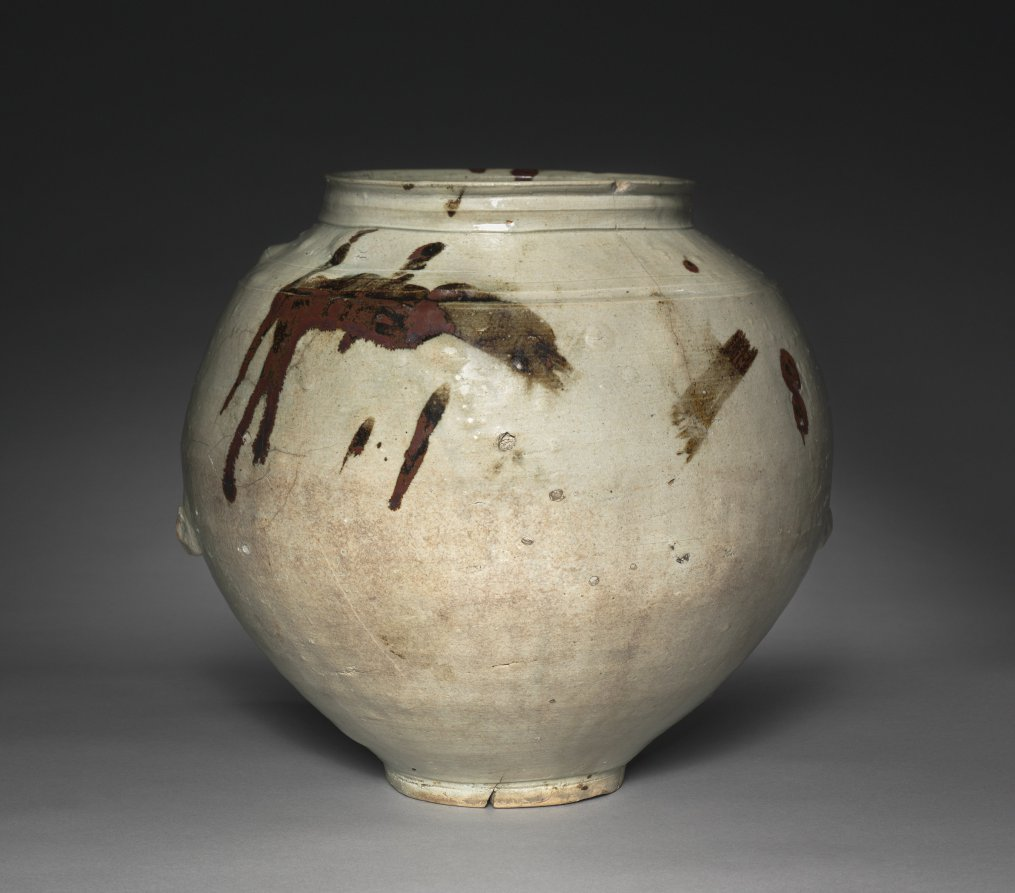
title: Jar with Design in Underglaze Iron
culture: Korea, Joseon dynasty (1392–1910)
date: 1800s–1900s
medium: porcelain with underglaze iron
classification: Ceramic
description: The potter’s splashed sketchy brushwork in underglaze over the somewhat rough surface gives this jar a strikingly modern look. This type of Korean porcelain work featuring unfinished and raw qualities served as a source of inspiration for many European ceramists in the mid-1900s, particularly British studio potters who searched for a new set of aesthetics that favored bold and abstract design.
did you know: This type of Korean porcelain work featuring unfinished and raw quality inspired many European ceramists including Bernard Leach (1887–1979), the father of British studio pottery.